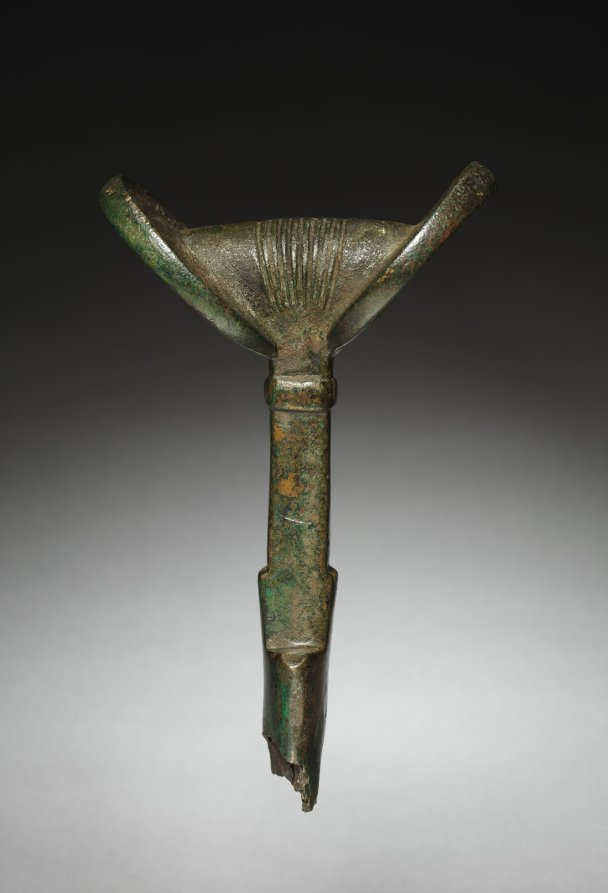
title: Sword Handle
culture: Iran, Luristan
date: 2000–1000 BCE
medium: bronze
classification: Metalwork